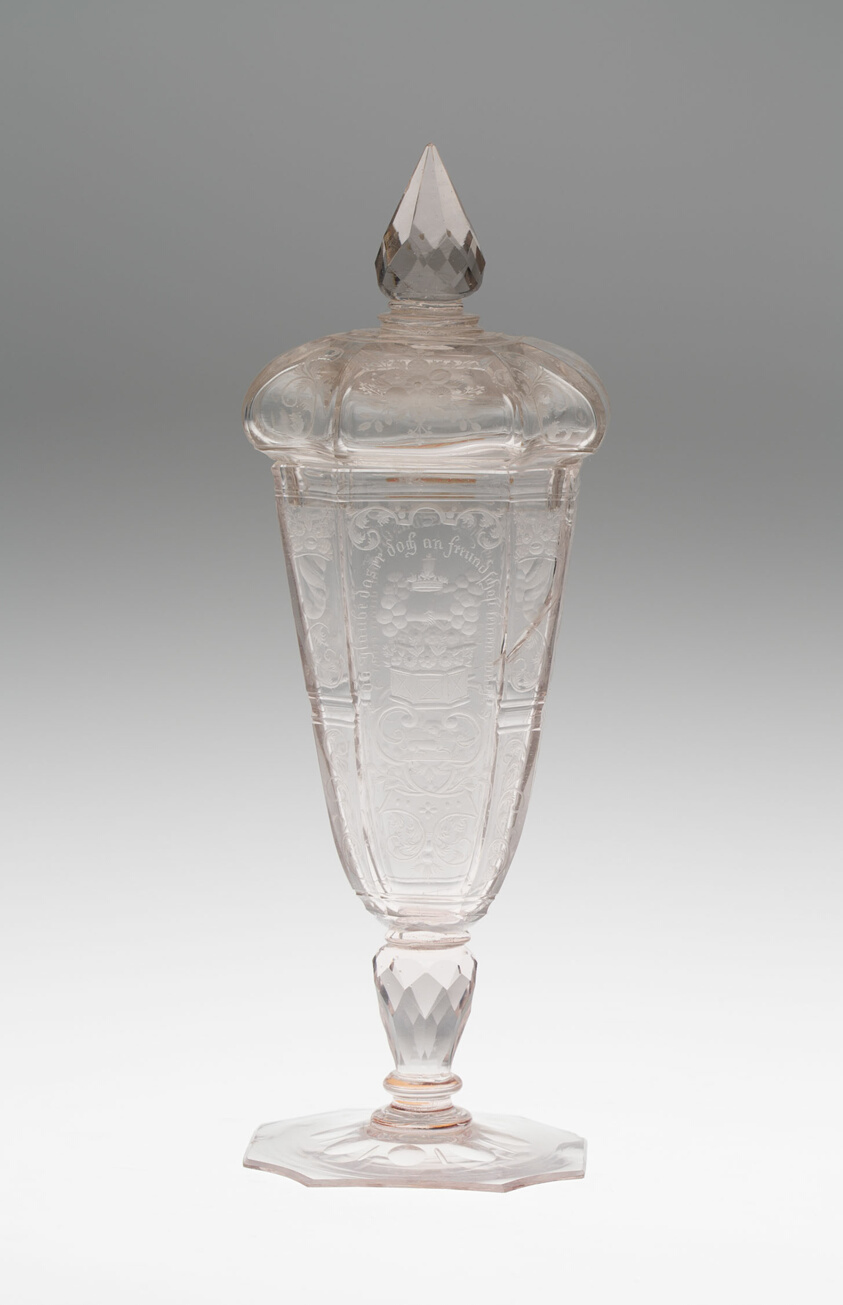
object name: Glass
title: Goblet with Cover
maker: Bohemia, Czech Republic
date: c. 1725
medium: Glass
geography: Bohemia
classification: drinking vessel; glass; european decorative arts